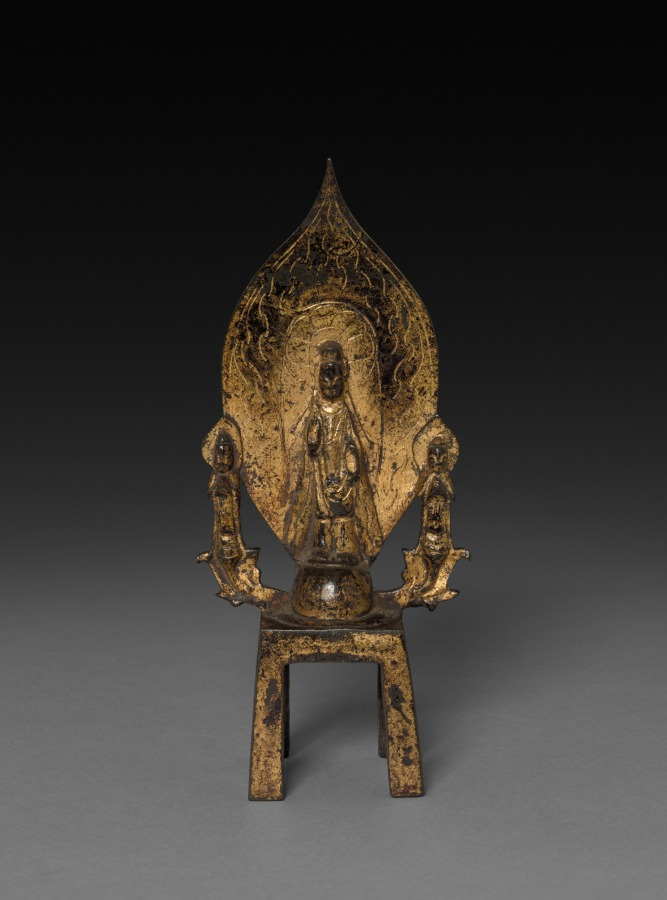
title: Sakyamuni with Two Attendants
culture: China, Sui dynasty (581-618)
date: 600s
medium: gilt bronze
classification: Metalwork